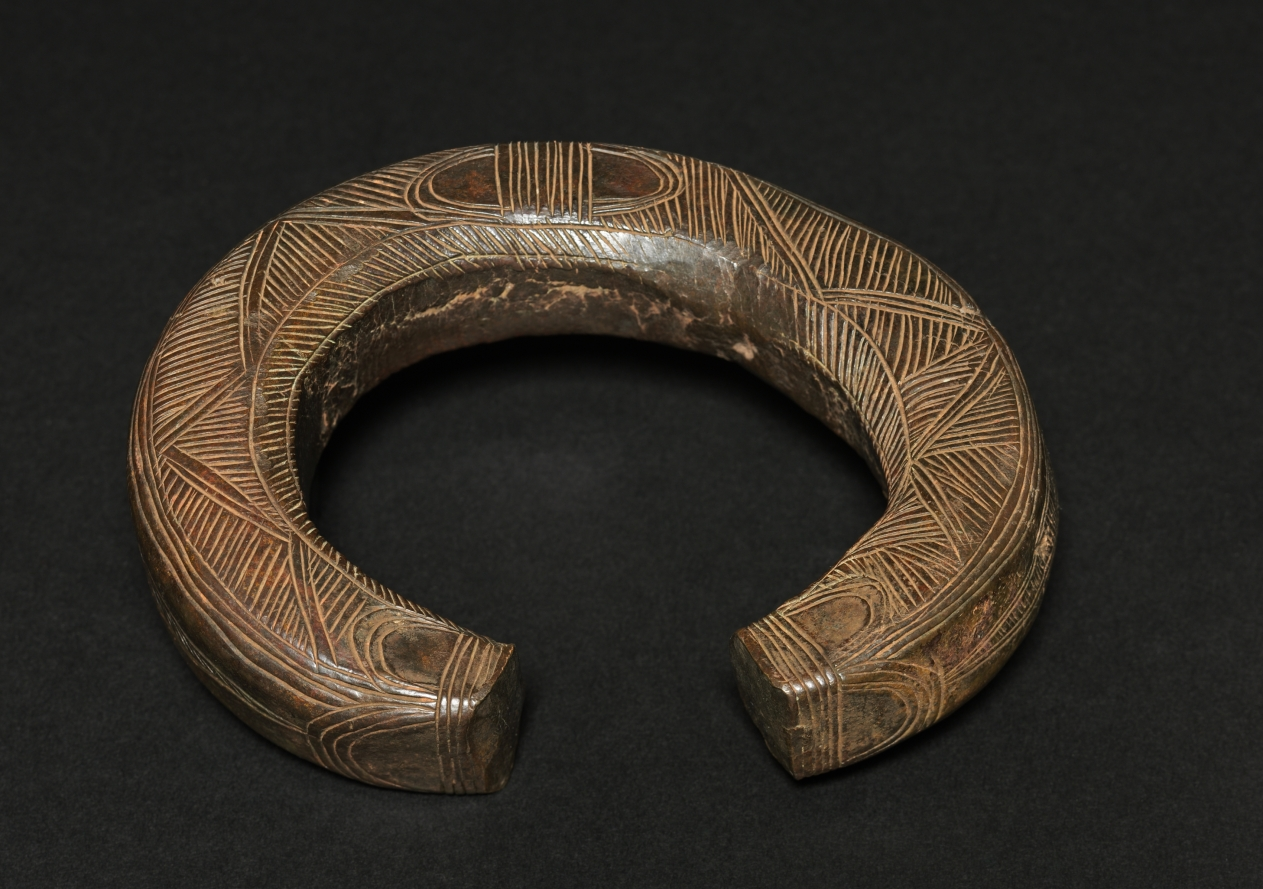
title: Bracelet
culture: Africa, Central Africa, Gabon, Fang-style maker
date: 1900s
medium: Copper alloy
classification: Jewelry